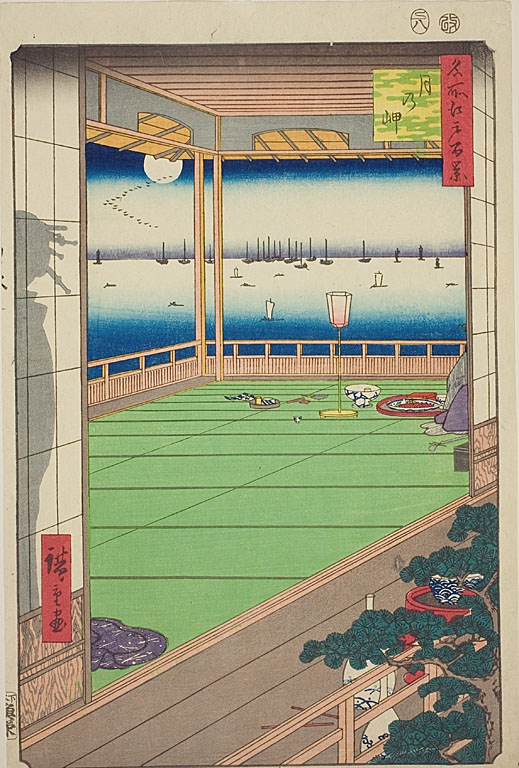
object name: Print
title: Moon-Viewing Point (Tsuki no misaki), No.82 from the series "One Hundred Famous Views of Edo (Meisho Edo hyakkei)"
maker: Utagawa Hiroshige (Japanese, 1797-1858)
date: 1857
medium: Color woodblock print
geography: Japan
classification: woodblock print; print; asian art